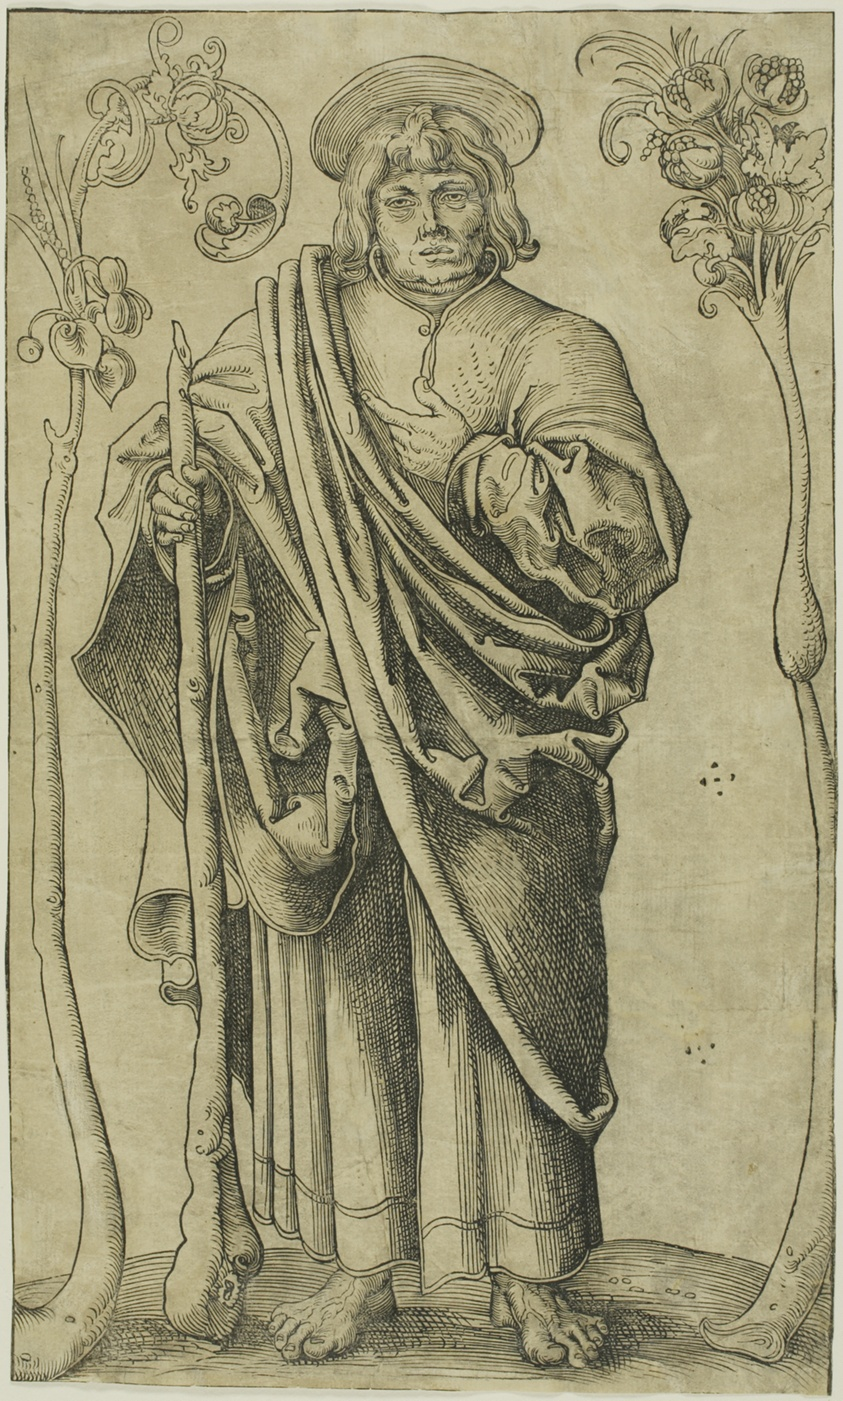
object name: Print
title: Saint Jude, from Christ, the Apostles and Saint Paul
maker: Lucas Cranach the Elder (German, 1472-1553)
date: 1510/15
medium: Woodcut in black on buff laid paper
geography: Germany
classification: woodcut; print; prints and drawing